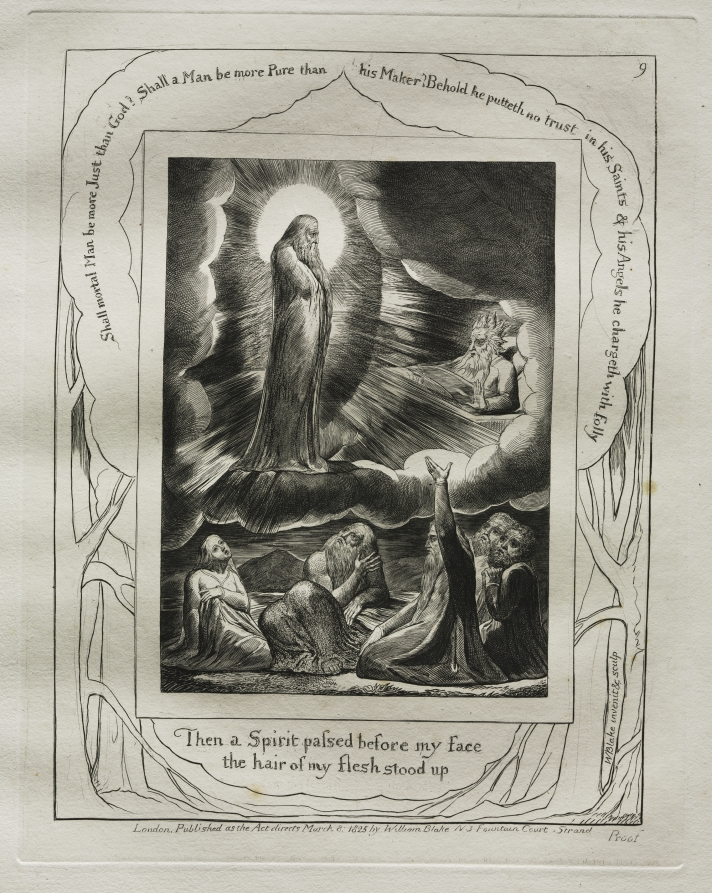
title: The Book of Job: Pl. 9, Then a Spirit passed before my face / the hair of my flesh stood up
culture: England, 18th century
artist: William Blake (British, 1757–1827)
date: 1825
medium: engraving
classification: Portfolio